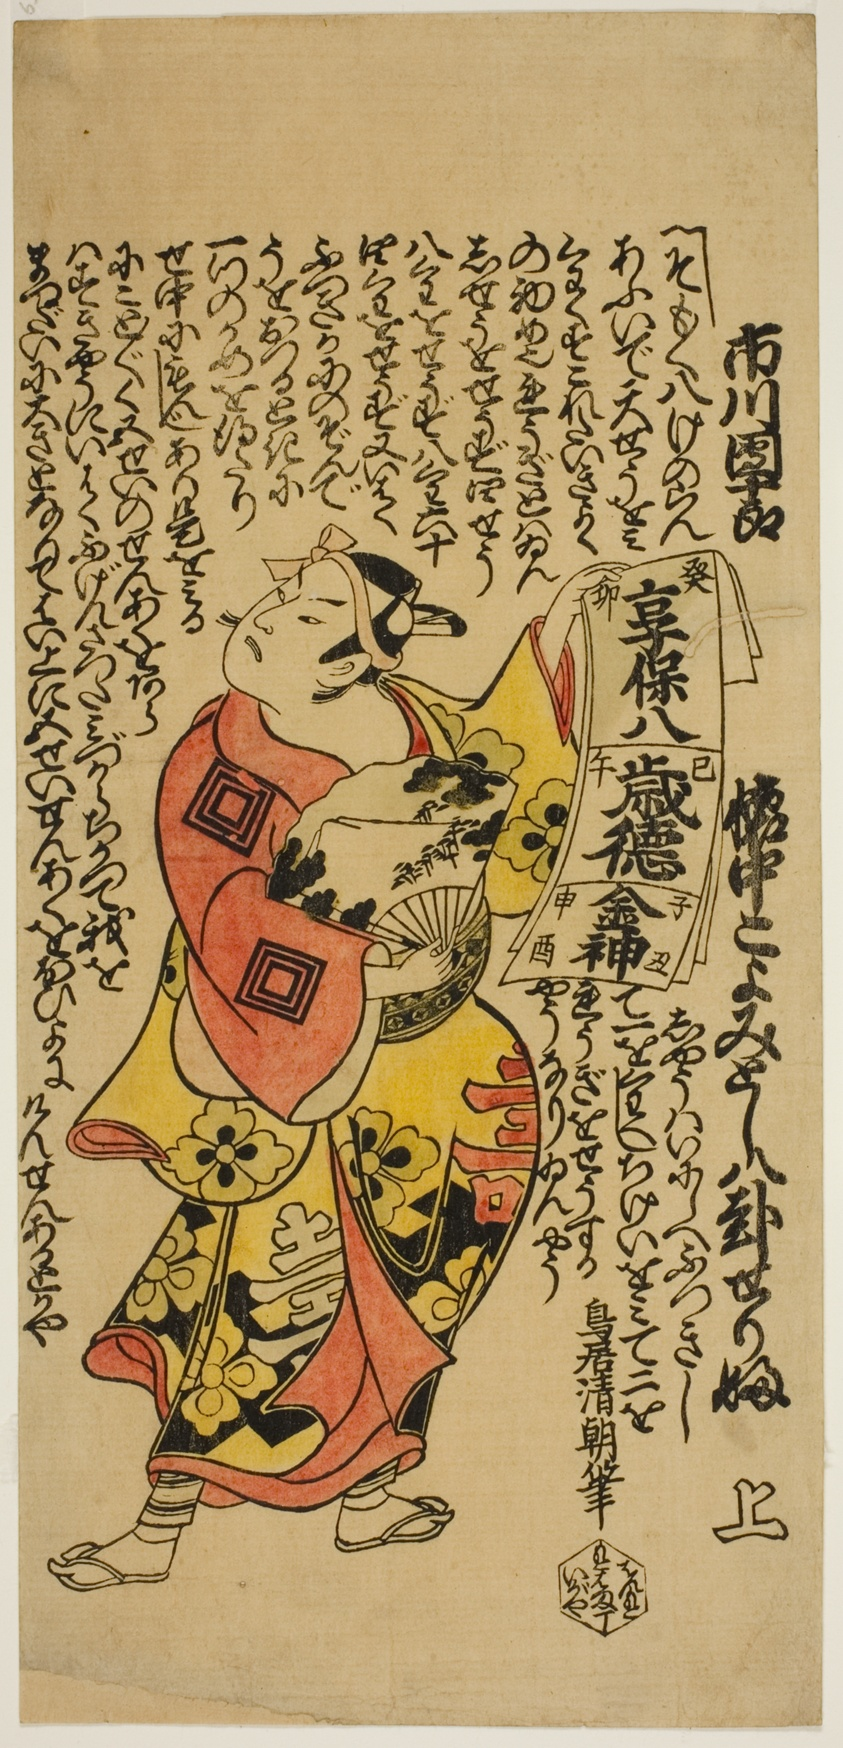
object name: Print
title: The Actor Ichikawa Danjuro II as Soga no Goro in the play "Soga Koyomi Biraki," performed at the Nakamura Theater in the first month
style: Japanese (culture or style)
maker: Torii Kiyotomo (Japanese, active c. 1717-36)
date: 1723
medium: Hand-colored woodblock print; hosoban, beni-e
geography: Japan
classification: woodblock print; print; asian art